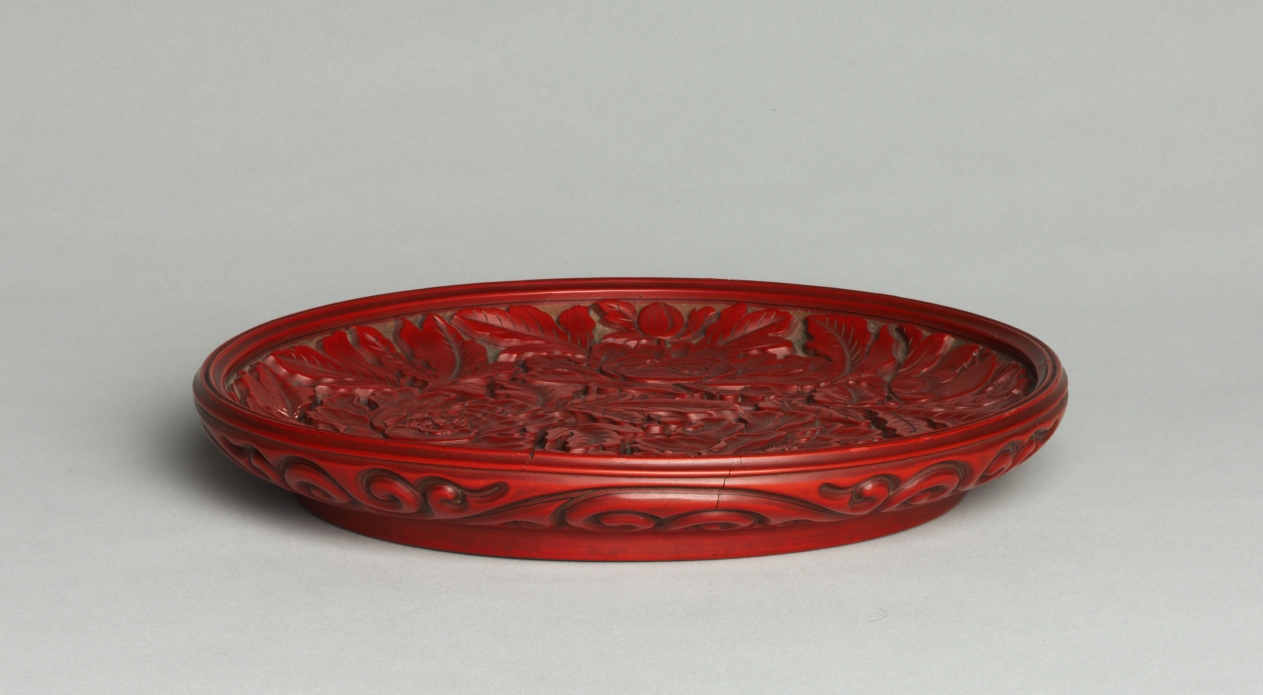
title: Plate with Peony Decoration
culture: China, Yuan dynasty (1271-1368)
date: late 1300s–early 1400s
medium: carved cinnabar lacquer on wood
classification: Lacquer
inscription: Signature incised on bottom: Yang Mao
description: This lacquer dish of strikingly deep red color is decorated with a dynamically carved design of three peony blossoms. Because of the complexity in lacquer production, items are often small and were seldom made for daily use. Lacquer was traditionally made using the sap of the lacquer tree found in southern China. Many successive layers of lacquer would be applied until the surface could be carved into complex geometric or figural forms. Red became the preferred color for lacquerware carvings, in part because the color has long been associated with good fortune in China.